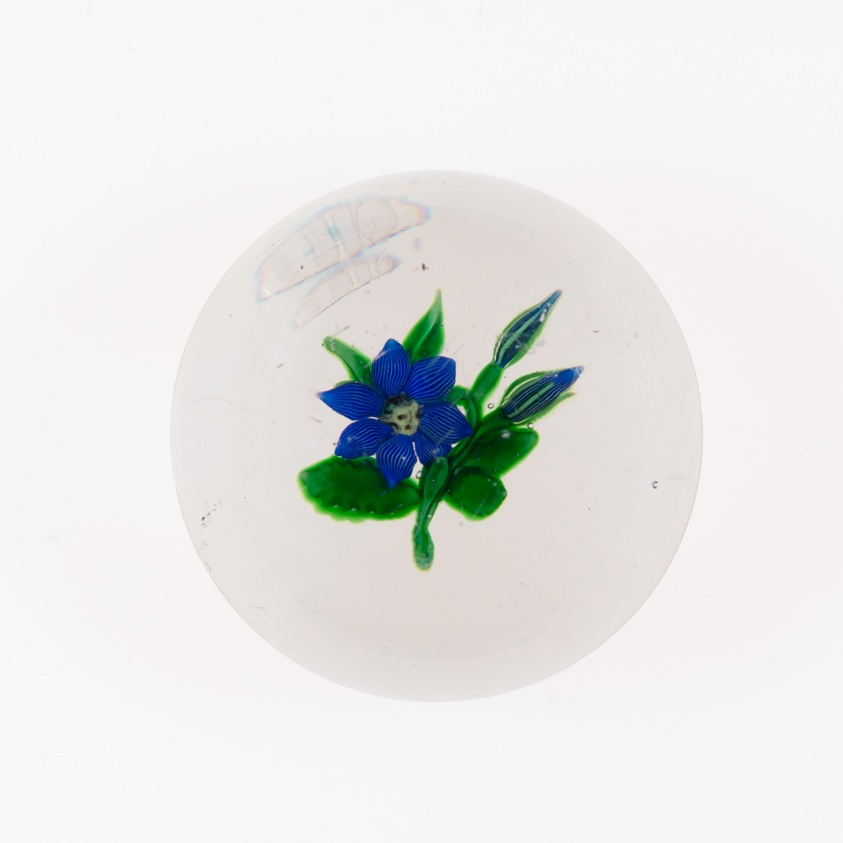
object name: Glass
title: Paperweight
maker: Saint-Louis Glassworks (Cristalleries de Saint-Louis); Lorraine, France, founded 1586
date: 19th century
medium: Glass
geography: Saint-Louis-lès-Bitche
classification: paperweight; glass